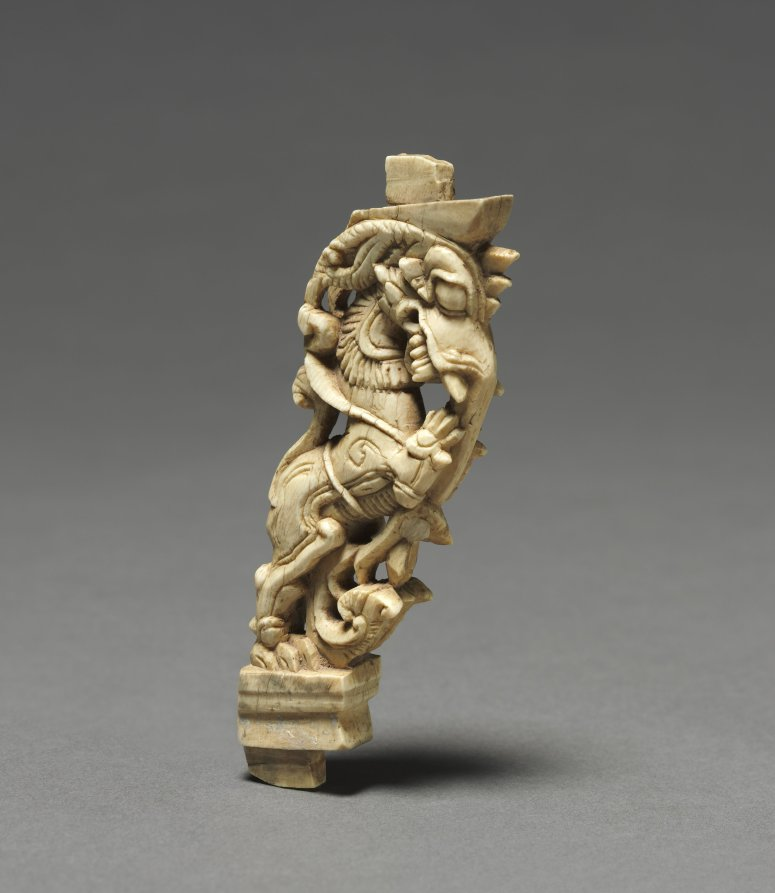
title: Carved Bracket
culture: South India, probably Madurai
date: 1600s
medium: Ivory with traces of pigment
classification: Ivory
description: Composite creatures with the body of a lion, tusks and trunk of an elephant, and horns of an antelope are standard elements of medieval Indian architecture and furniture. Traces of pigment indicate that these ivory furniture facings were brightly painted.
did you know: These composite beasts are called yali or vyala.